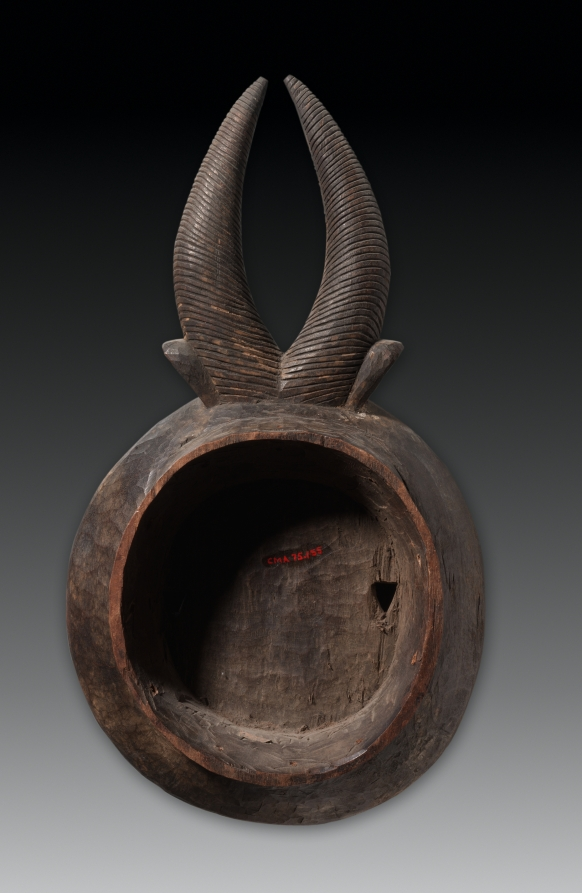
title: Mask (Kple Kple or Kouassi Gbe)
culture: Africa, West Africa, Côte d’Ivoire, Baule-style carver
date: late 1800s-early 1900s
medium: Wood, resin, and paint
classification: Mask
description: This kple kple mask belongs to the first of four pairs of masks that entertain as part of a performance sequence in the goli dance. The male in each pair dances first. The masks are worn by young boys in a rapid stamping dance. The masqueraders alternate with each other and watch their partners perform. The head of the male kple kple is painted red, whereas the female, like this example, is colored black.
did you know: The wearer of this mask would secure it on his face by biting onto a (now-missing) piece of rope attached to the back.